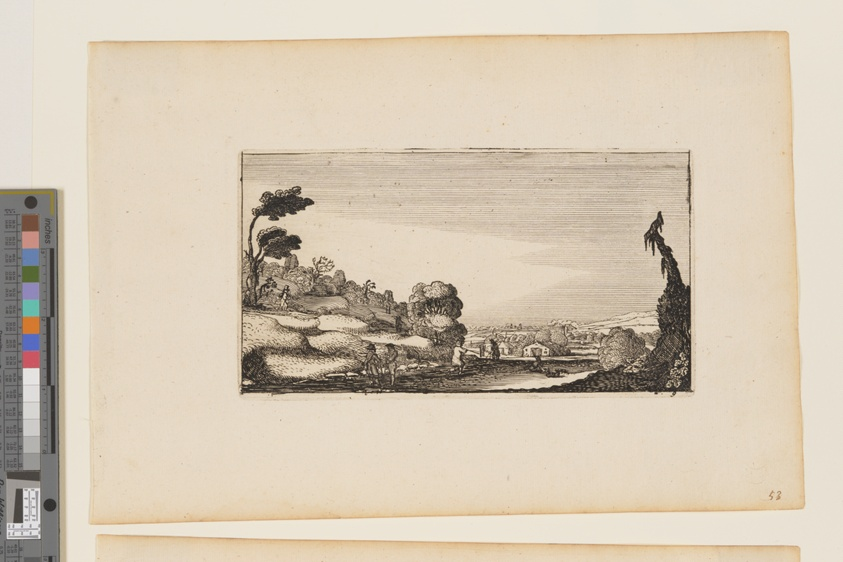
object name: Print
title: Hilly Panorama, from Twelve landscapes with Figures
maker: After Gillis van Scheyndel; Dutch, 1595–1660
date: 1624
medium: Etching on ivory laid paper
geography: Netherlands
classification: etching; paper; print; prints and drawing